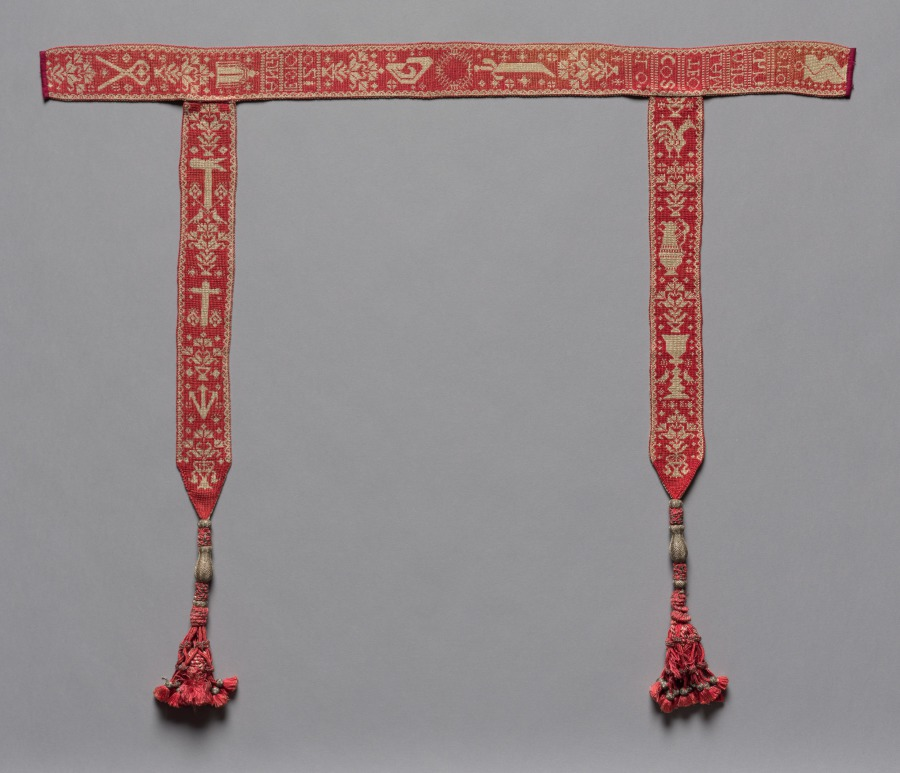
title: Bible Mark (One of Four)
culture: Spain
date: 1700s–1800s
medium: knitted silk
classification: Knitting